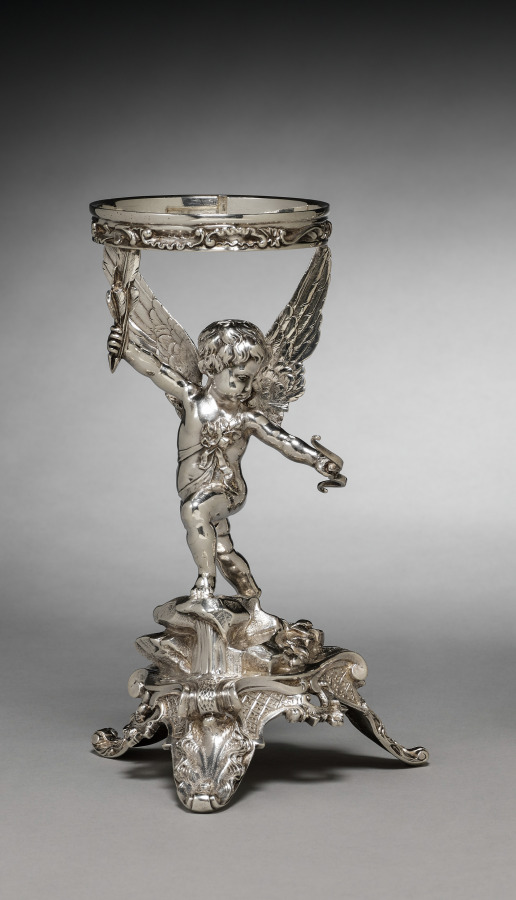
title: Stand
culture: Russian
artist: House of Fabergé (Russian, 1842–1918)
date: c. 1890–99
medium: silver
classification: Silver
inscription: Inscribed “K. Fabergé” in Cyrillic, surmounted by the double-headed Imperial eagle.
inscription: “88” silver standard